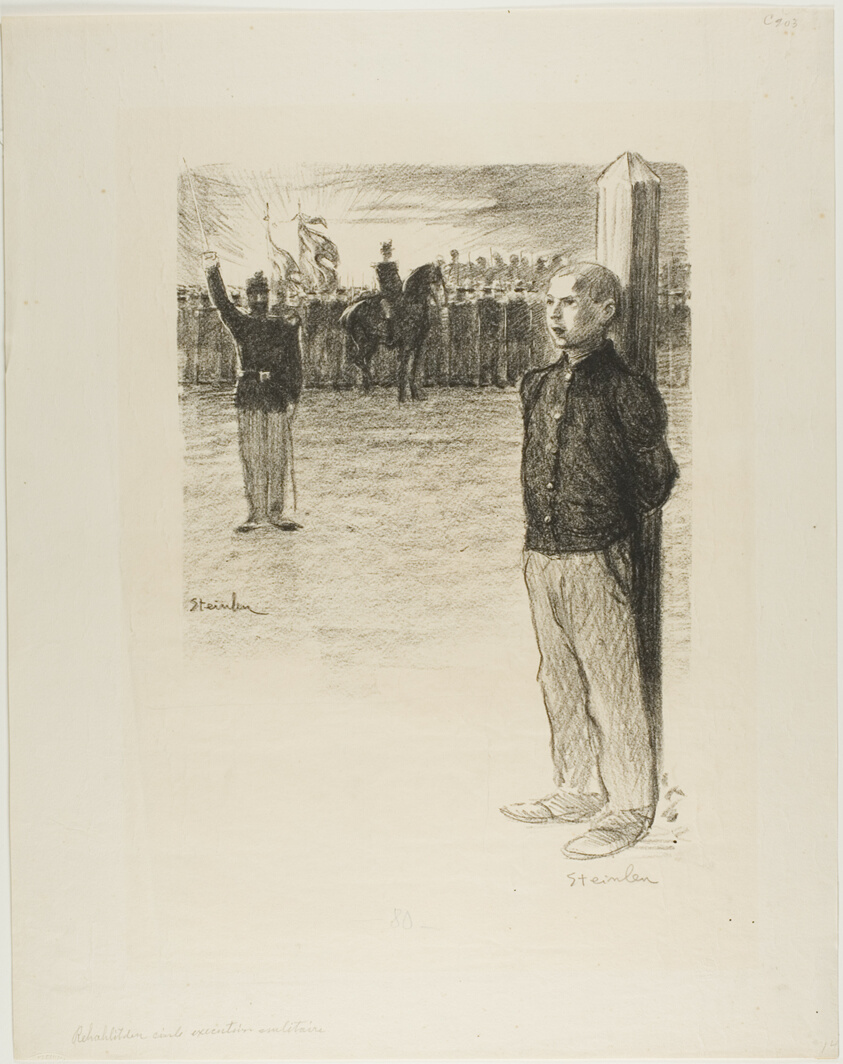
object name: Print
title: Civil Rehabilitation and Military Execution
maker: Théophile-Alexandre Steinlen; French, born Switzerland, 1859-1923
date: December 1897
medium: Lithograph in black, with scraping on stone and blue pencil additions, on ivory wove paper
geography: France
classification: lithograph; print; prints and drawing